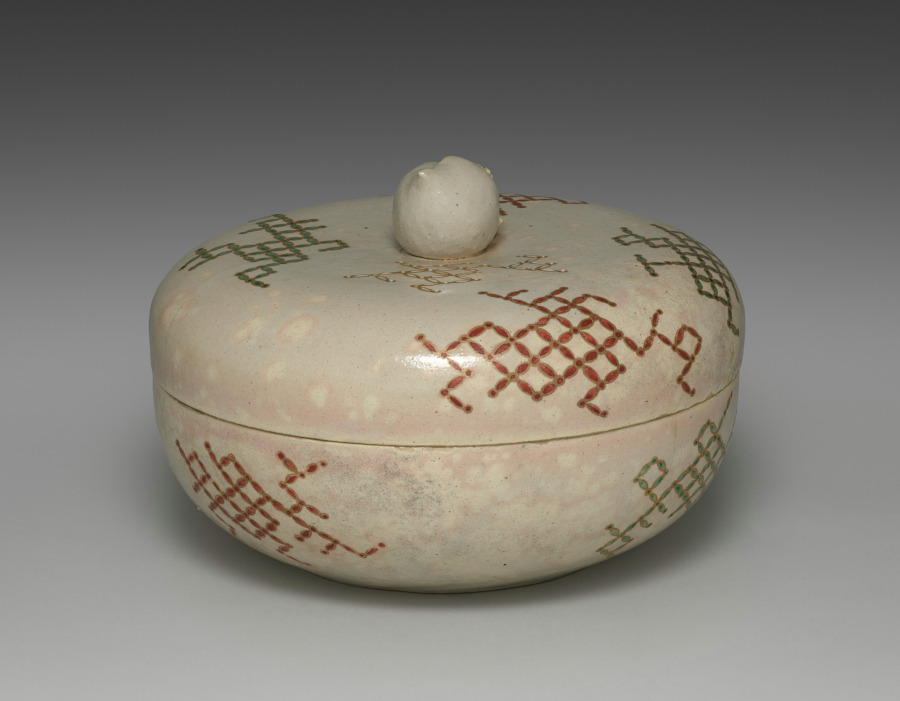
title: Covered Bowl with Seven Treasures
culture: Japan, Edo period (1615–1868)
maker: Seifū Yohei II (Japanese, 1844–1878)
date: 1861–78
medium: Stoneware with overglaze color enamel and gold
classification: Ceramic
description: The box lid for this large covered bowl by Yohei II identifies it as in the style of Ninsei, a reference to Nonomura Ninsei. Overglaze enamels in red, green, and white sit within lattices of jewel-shaped gold forms scattered across the lid and base in a design known as the seven treasures. At the center of the lid is a knob in the shape of a peach with a stem and leaves. A prominent feature of the piece is the appearance of warm pink dots known as gohon. Here creamy at their center and with a gradation to almost red at the edges, they appear during firing due to high iron content in the clay. Pieces with this effect were made in emulation of certain ash-glazed ceramics imported from Korea. The originals were made to order for the Japanese market at a kiln in Busan. The kiln was established within the Japanese diplomatic compound in that port city by the lord of Tsushima in 1639 and continued production until 1717. In the 17th century, teabowls from Korea in a variety of styles were extremely popular among practitioners of Japanese-style tea, and they were soon copied by ceramists active on the archipelago, including in Kyoto.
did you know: The peach's leaf veins are detailed in gold.